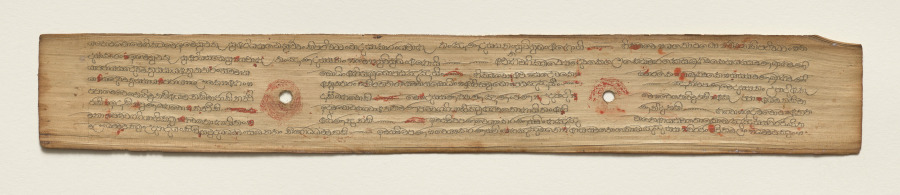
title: Leaf from a Buddhist Manuscript (verso)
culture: Sri Lanka, Singhalese, Late 17th century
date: c. 1700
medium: fiber paper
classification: Manuscript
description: Palm leaf material is still used for manuscripts in Sri Lanka. The palm leaves are prepared first by boiling them, drying them in the sun, and then rubbing them with oils. Scribes then use a metal stylus to incise the text. Then charcoal powder is wiped across the pages, filling in only the inscribed lines.